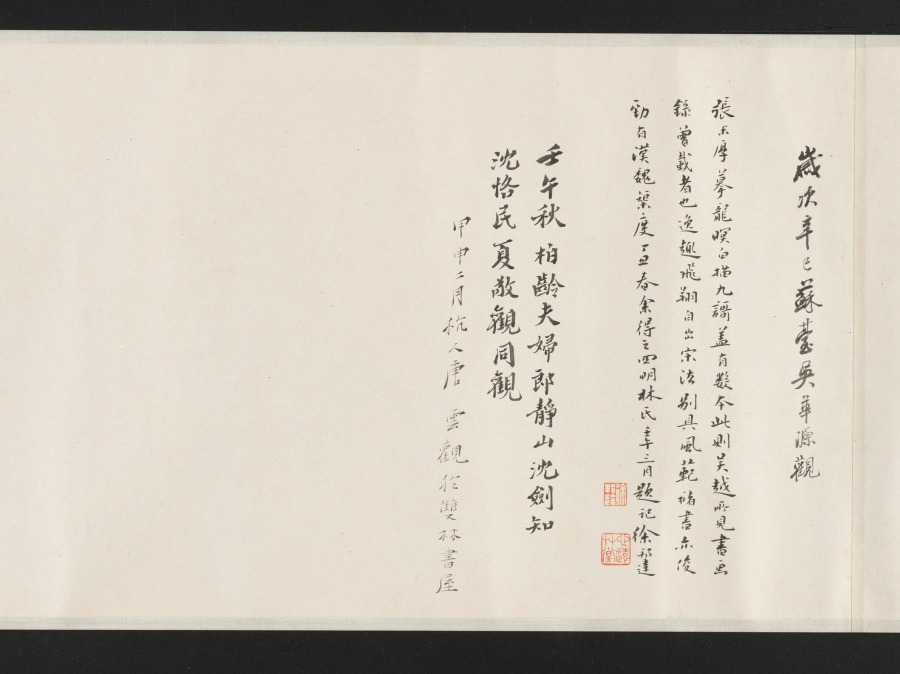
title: Nine Songs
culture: China, Yuan dynasty (1271-1368)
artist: Zhang Wo (Chinese, active c.1336–after 1364)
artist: Chu Huan (Chinese, active 1361)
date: 1361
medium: handscroll; ink on paper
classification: Painting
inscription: 7 colophons and 47 seals: 1 colophon, dated 1361, and 28 seals of Chu Huan 褚奐 (active c. 1361); 1 colophon, dated 1785, and 1 seal of Lu Shihua 陸時化 (1714-1779); 2 seals of Lu Yü-ch'ing (18th c.); 1 colophon, dated 1935, of Ye Gongchuo 葉恭綽 (1881-1968); 1 colophon, dated 1935, of Wu Hufan 吳湖帆(1894–1968); 1 colophon, dated 1938, and 1 seal of Wang Tongyu 王同愈 (1856-1941); 1 colophon, dated 1941, of Wu Huayuan 吳華源 (1893-1972); 1 colophon, dated 1942, and 9 seals of Xu Bangda 徐邦達 (1911–2012); 1 colophon, dated 1942, of Lang Jingshan 郎靜山 (1892-1995); 1 colophon, dated 1944, of Tang Yun 唐雲 (1910-1993); 6 seals of Wang Jiqian [C.C. Wang] 王季遷 (1907–2003).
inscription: Text of The Nine Songs written by Chu Huan at the end of each section.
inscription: 右離騷九歌圖，宋龍溟居士李公本，淮南張渥叔厚所畫妙絕當世。家藏請予書其辭目識于左。至正二十一年辛醜三月旦河南褚奐記。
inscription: Colophon by Lu Shihua 陸時化 (1714–1789): This scroll is fortunate to have been handed down from collections of the right people. Now, after 500 years, its condition is as good as when it was painted. I acquired this from Mr. Shen Guiyu [1673-1769], the President of the Board of Rites. The label is in his handwriting when he was 95 years old. I submit that Chu Huan (t. Shiwen) of the Yuan Dynasty was a native of Qiantang. His "seal" and li writings are in the style of Wu Rui. For example, in [Chu Kuei's] Ming ji lu [A list of masterpieces] is recorded the stele commemorating the restoration of the prefectural school of Kun-shan, the text of which was composed by Yang Weizhen in the twenty-first year of Zhizheng [1361]; and the calligraphy as well as the title in li style was by Chu Huan, who was at that time an assistant judge of the prefecture of Haining in the circuit of Hangzhou. Zhang Wo's zi is Shuhou (叔厚). His literary name is Zhen Qisheng (贞期生). According to [Gu Ying's] Yu shan cao tang ya jii, he liked to paint in the bai-miao or the "pure delineation" style after the method of Li Longmian [Li Gonglin 李公麟], which finds no peer among the ancient masters. This is agreed upon [by Pei Ch'iung] in his Qing jiang zhi who praised [Zhang Wo] as being quite learned and well-versed in many branches of the arts, especially figure painting. Recorded by Lu Shihua [The mountain dweller], listening to the pine, in the twelfth month of the yisi year [1785].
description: Painted in the baimiao, or fine-line drawing style, this ancient work demonstrates the literati’s use of abstract calligraphic brushwork for self-expression. The subject of the “Nine Songs”—songs associated with shamanistic rituals in the ancient Chu kingdom—had traditionally provided artists with myths and legends that they could explore and reinterpret in their own works.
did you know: Divided into eleven sections, the scroll contains illustrations by painter Zhang Wu followed by a transcription of the relevant verse by calligrapher Chu Huan.